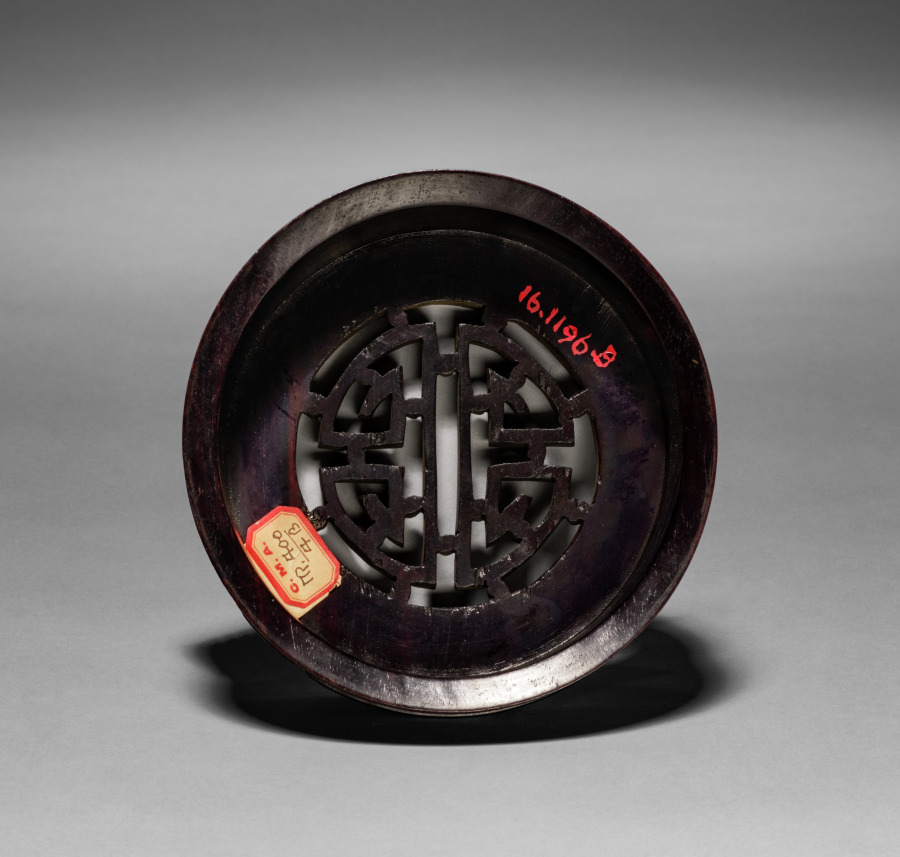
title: Jar (lid)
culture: China, Qing dynasty (1644–1911), Qianlong reign (1736–95)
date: 1736–95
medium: carved wood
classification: Ceramic